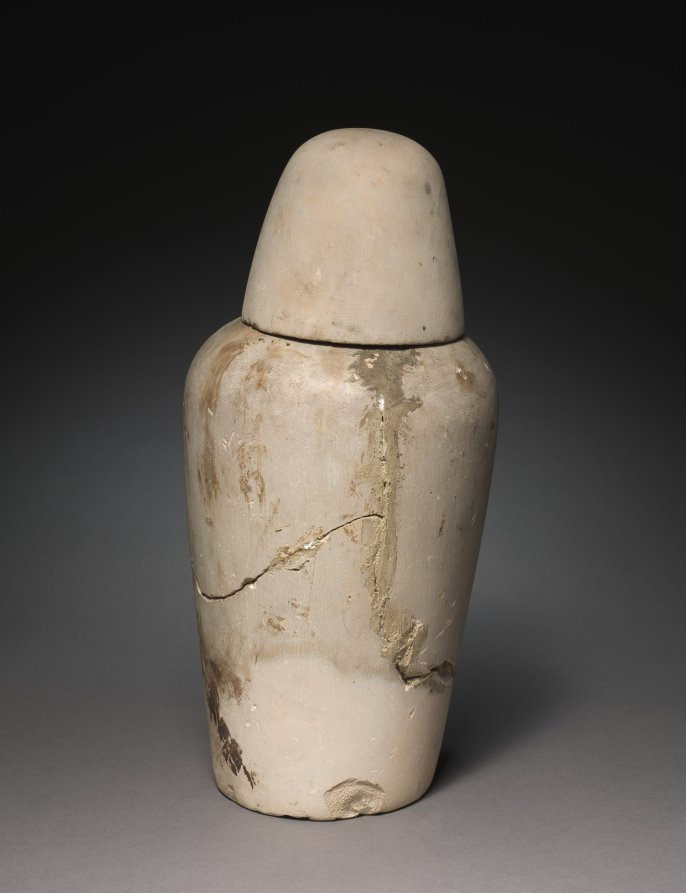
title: Canopic Jar with Lid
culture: Egypt, New Kingdom (1540–1069 BCE), Dynasty 18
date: 1540–1296 BCE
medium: limestone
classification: Funerary Equipment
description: In the process of mummification certain organs, the liver, lungs, stomach, and intestines, were removed, embalmed separately , and stored in jars known as canopic jars. Although this jar and another from the collection (1914.630) were presumably from the same individual and therefore the same set, they differ in their materials, workmanship, size, and style of inscriptions. Made of a different limestone this jar, the smaller of the two, has a lid in the form of a rather ludicrous male head. It is clearly by another hand. A sizable fragment is lost from the body. IN contrast to the poor quality of the head, the handsome inscription on the body is deeply cut and filled in with a blue pigment. It reads, "[Words spoken by Nephathys:] 'May your arms embrace that which is in you. May you protect Hapy, who is in you, and the honored one before Hapy, the Osiris, the royal herald, Gregmennefer, vindicated."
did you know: Canopic jars are named after the Greek sailor Canopus, who was said to be buried at Canopus (Abuqir) in the western delta and worshipped there in the form of a human-headed jar. It was actually a form of Osiris and had nothing to do with internal organs, but the term has stuck.